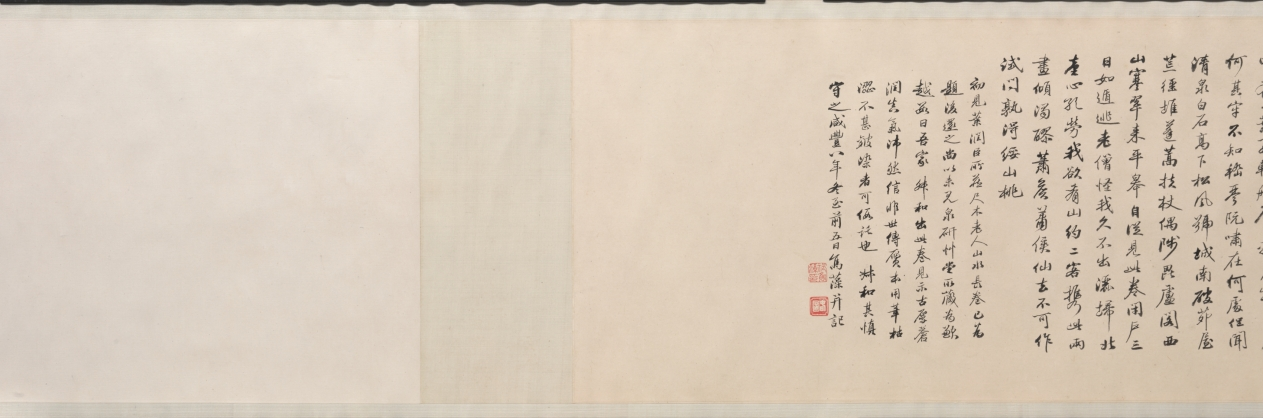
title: Pure Tones among Hills and Waters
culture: China, Qing dynasty (1644-1911)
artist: Xiao Yuncong (Chinese, 1596–1673)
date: 1664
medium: Handscroll; ink and light color on paper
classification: Painting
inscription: 種松發秀色，具是高人心。/ 鑿石築茅屋，長年覆綠陰。/ 白雲無意出，舒卷趨空林。/ 萬籟時一寂，微風墮清音。/ 此情莫可擬，此景誰能論。/ 只向千峰裏，共彈五絃琴。/ 桃花依綠水，不覺又春深。 甲辰花朝題于青蓮閣, 鐘山老人蕭雲從。[印] 鐘山老人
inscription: Title and inscription, dated 1744, and 3 seals of Shen Feng 沈鳳 (1685-1755).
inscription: 4 colophons and 24 additional seals: 1 colophon, dated 1811, and 5 seals of Xiang Yuan 項源 (active about 1811); 1 colophon, dated 1858, and 2 seals of Qi Junzao 祁寯藻 (1793-1866); 1 colophon and 4 seals of Zhang Yunzhong 張允中 (1881–1960?); 4 seals of Jiang Xun 江恂 (active about 1753–after 1780); 1 colophon dated 1943, and 2 seals of Wang Shaoming 汪兆銘 (Wang Jingwei 汪精衛, 1883–1944); 1 seal of Qi Zhiliu 祁之鏐 (active about 1858); 2 seals of Yu Zhimeng 俞芷盟 (second half of 19th century); 4 seals unidentified.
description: Painted at age 68, this landscape is one of Xiao Yuncong’s most mature works. Extraordinary in its combination of fine details with bold brushstrokes and bluish washes, it is also one of his longest compositions in handscroll format, extending over 23 feet. Throughout his lifetime, Xiao visited Nanjing and Yangzhou, where he met with other painters and literati. Regarded as the founder of the Gushu school (姑孰派) of painting, Xiao painted from nature, and his landscapes are informed by his travels, as well as by his experience as a print designer.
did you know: Biographical notes on Xiao Yuncong relate that he did not pursue the career of an official, but "furnished a cottage in the eastern suburbs [of Wuhu in Anhui province] and amused himself playing the qin (zither) and reading every day."